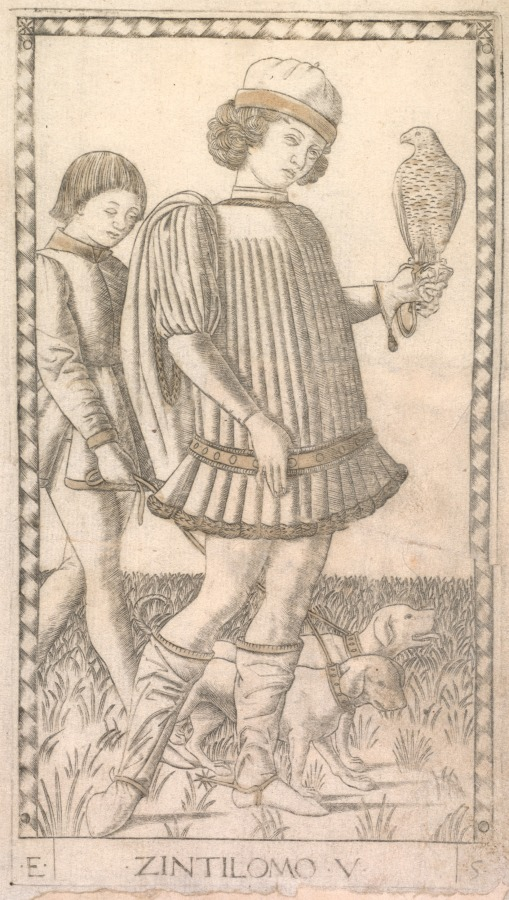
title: Gentleman (from the Tarocchi series E: Conditions of Man, #5)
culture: Italy, Ferrara, 15th century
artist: Master of the E-Series Tarocchi (Italian, active 1460s)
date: c. 1465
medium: engraving, hand-colored with gold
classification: Print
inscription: Lettered below the image of Zintilomo (The Gentleman): ·E· / ·ZINTILOMO·V· / ·5·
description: This engraving is part of the Tarocchi group marked with the letter E and named Conditions of Man. This series outlines the social and hierarchical order of ten characters (Beggar, Servant, Artisan, Merchant, Gentleman, Knight, Doge King, Emperor, and Pope), starting from the lower grade and ending with the most important one. Here, Zintilomo (The Gentleman) is shown as a full-length male figure, turned to the right. The elegantly dressed youth is holding up a falcon in his gloved left hand. A servant follows him at his back, and walks two dogs on a leash.